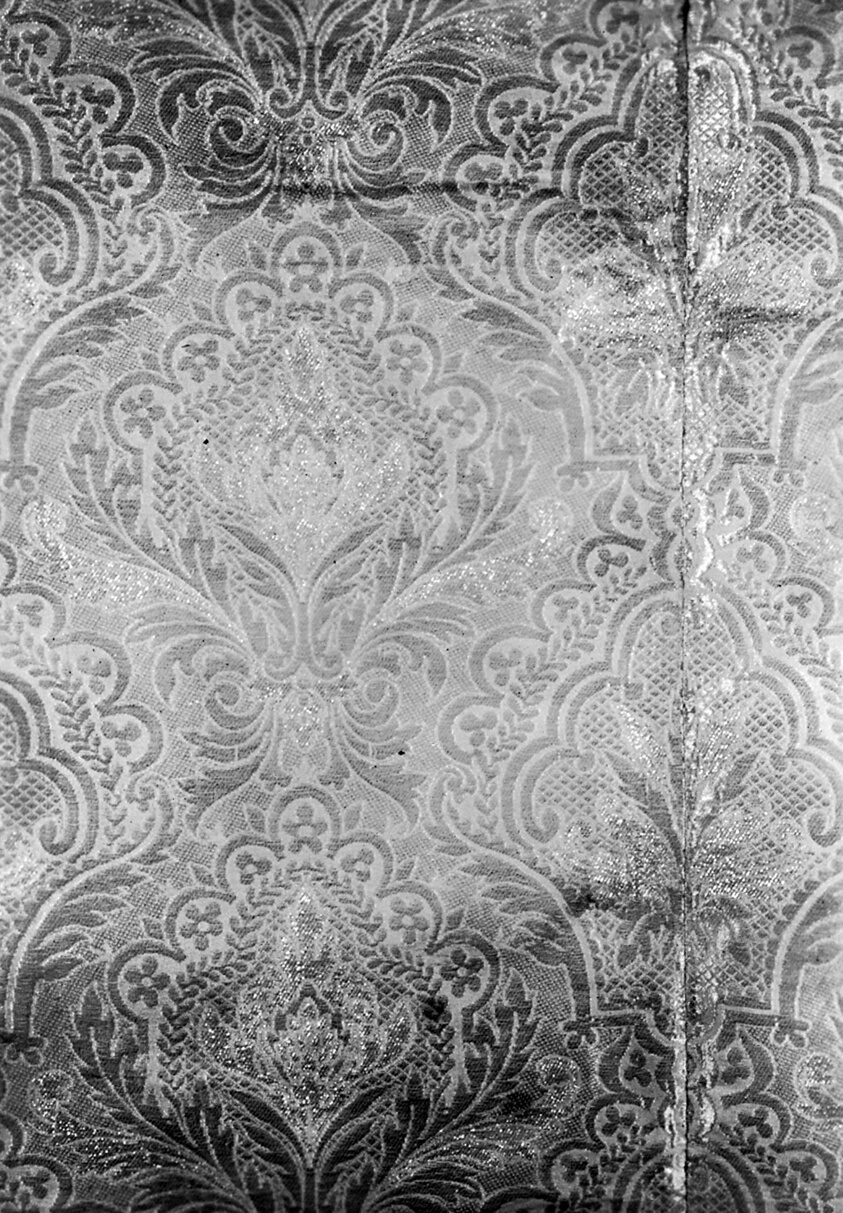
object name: Textile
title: Panel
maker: Russia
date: 1875/1900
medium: Brocaded plain compound cloth (research card)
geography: Russia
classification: textile; weaving